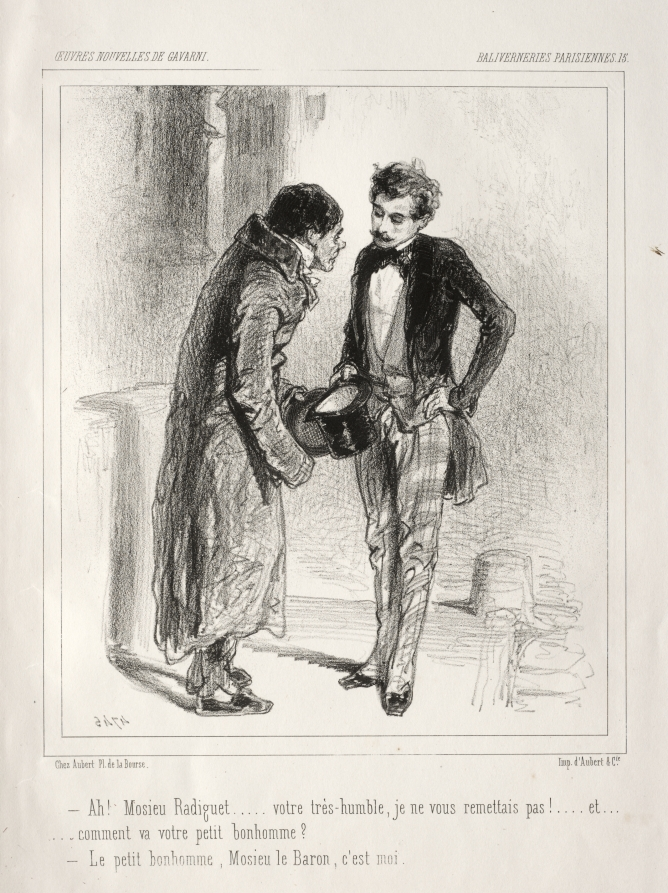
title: Baliverneries Parisiennes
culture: France, 19th century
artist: Paul Gavarni (French, 1804–1866)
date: c. 1847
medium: lithograph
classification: Print